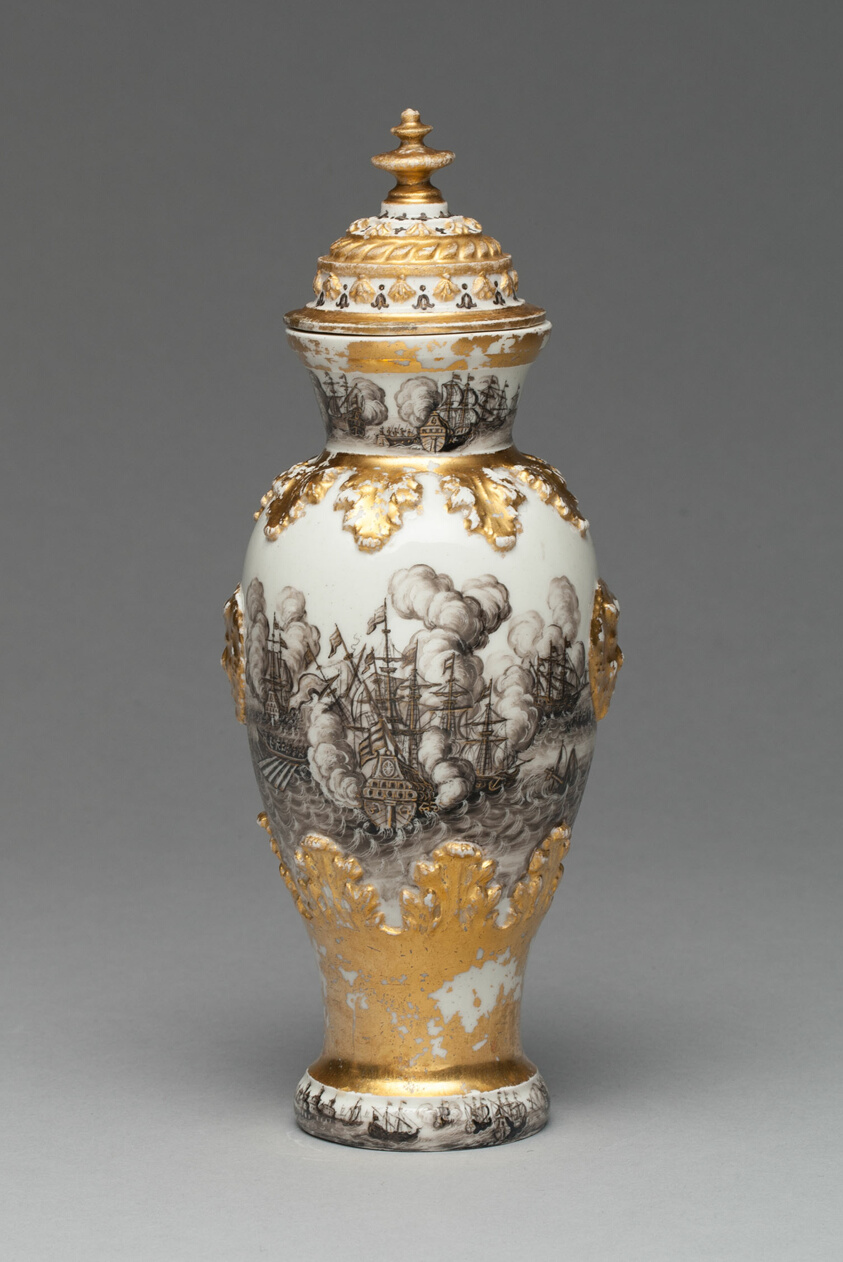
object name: Ceramics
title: Vase and Cover (one of a pair)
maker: Meissen Porcelain Manufactory; German, founded 1710; Decorated by Ignaz Preissler (German, 1676-1741)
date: 1715/20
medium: Hard-paste porcelain, black enamel (schwarzlot), and gilding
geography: Meissen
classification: vase; porcelain; vessel; ceramics; european decorative arts